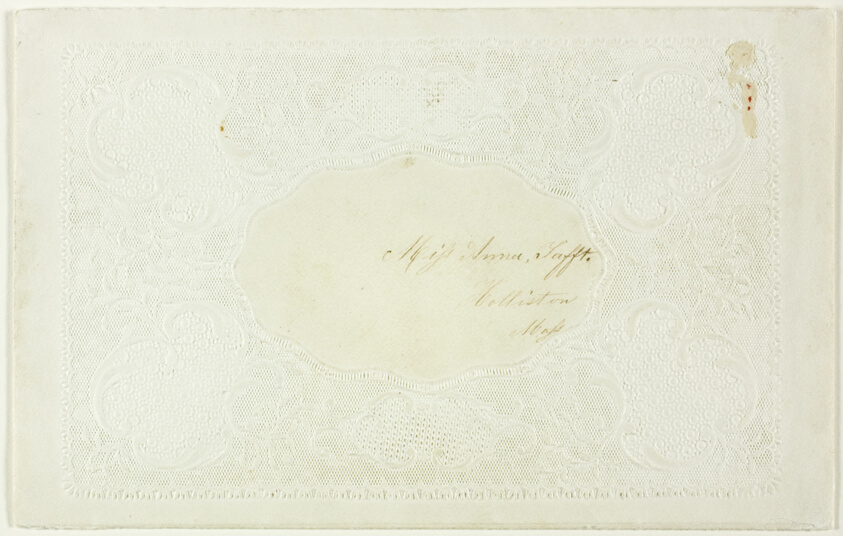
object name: Drawing and Watercolor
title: Untitled Valentine (Gold Ship in Wreath)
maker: Joseph Mansell (English, 19th century)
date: 1845/50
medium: Collaged elements on cut and embossed ivory wove paper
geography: England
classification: collage; valentine; prints and drawing; paper